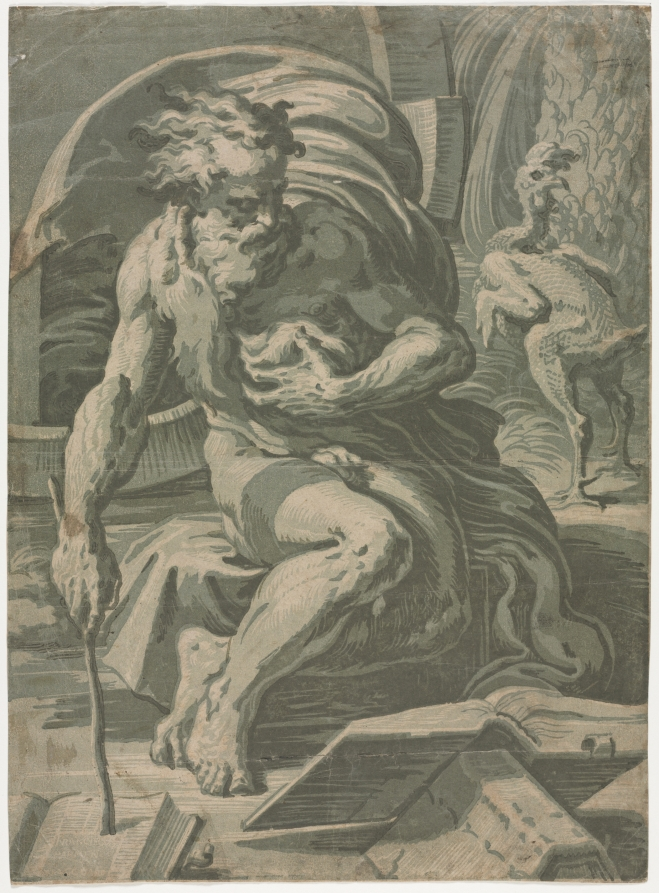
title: Diogenes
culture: Italy, 16th century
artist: Ugo da Carpi (Italian, c. 1479–c. 1532)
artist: after Parmigianino (Italian, 1503–1540)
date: c. 1524–27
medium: chiaroscuro woodcut (in four shades of green)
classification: Print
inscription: lower left, in block: FRANCISCVS / PARMEN· / PER·UGO CARP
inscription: verso, upper center, in graphite: Sadeler 1757 / N° 4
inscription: upper right, in graphite: 10376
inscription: across center, in pen and brown ink: N 13 [t?]alla[nf?]o [I.vinton?] [entire inscription is upsidedown]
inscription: lower left, in graphite: hos[...3--3--.]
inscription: lower left, in pen and brown ink: [illegible monogram]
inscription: lower left, in graphite: H. de Carpo after Parmesan / Diogenes B XII p.100.10;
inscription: lower right, in graphite: [illegible]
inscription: lower right, in graphite: mp[n...?]/2250[the'50' is smaller, raised, and underlined]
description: Diogenes was a Greek philosopher who lived during the 300s BC. The bird in the background alludes to his cynical response to Plato, who had described man as a featherless biped. Diogenes plucked a rooster and brought it to Plato’s school, exclaiming, “Here is Plato’s man!” Ugo da Carpi was influential in the development of the chiaroscuro woodcut in Italy. The term chiaroscuro combines the Italian words chiaro (light) and scuro (dark). Invented to emulate drawings with light and dark pigments on tinted paper, the printing technique uses multiple woodblocks to layer different tones of color. This example, considered a masterpiece of Renaissance printmaking, uses four shades of green to render tonal values; the paper provides the lightest color in the composition.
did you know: In his Lives of the Artists (1550), Giorgio Vasari described Diogenes twice, praising it as Ugo da Carpi's most accomplished and beautiful print.